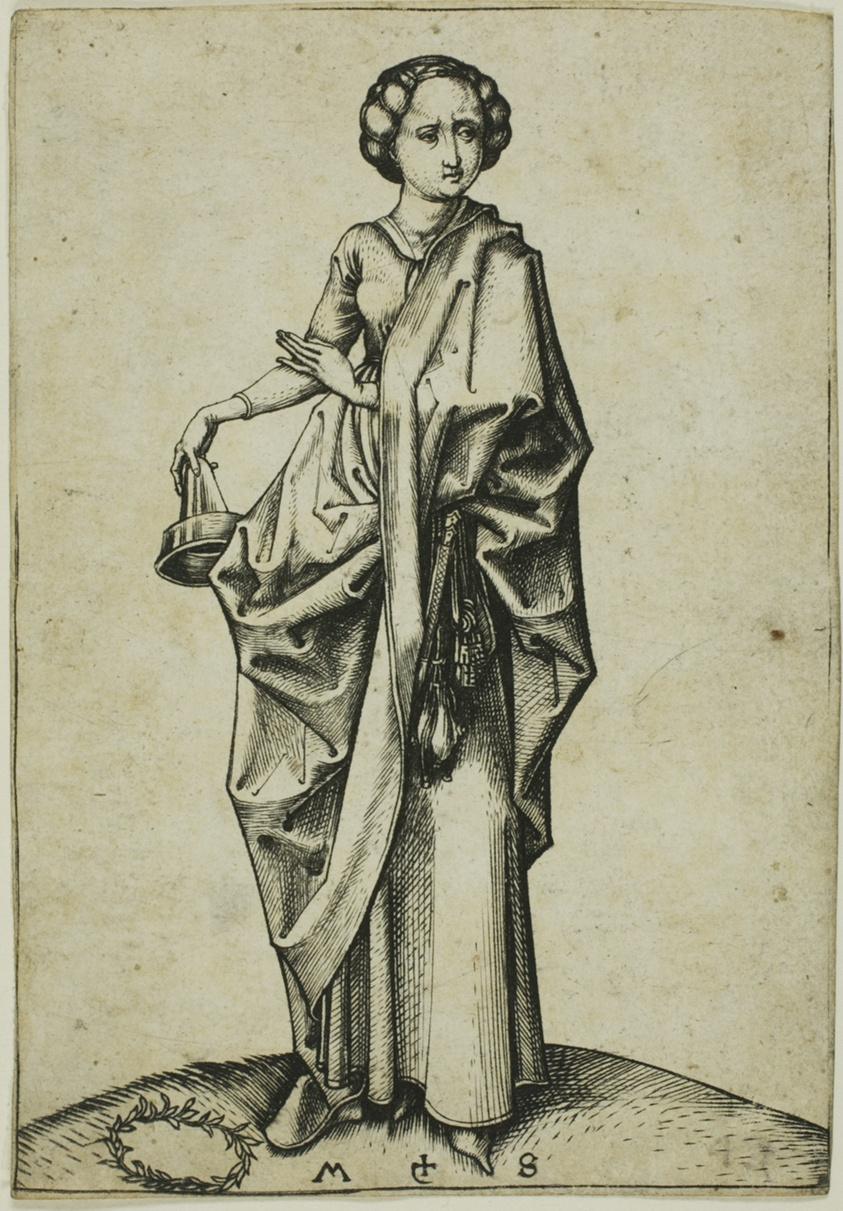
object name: Print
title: The Fourth Foolish Virgin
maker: Martin Schongauer (German, c. 1430/50-1491)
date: 1480-1491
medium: Engraving on paper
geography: Germany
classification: engraving; print; prints and drawing